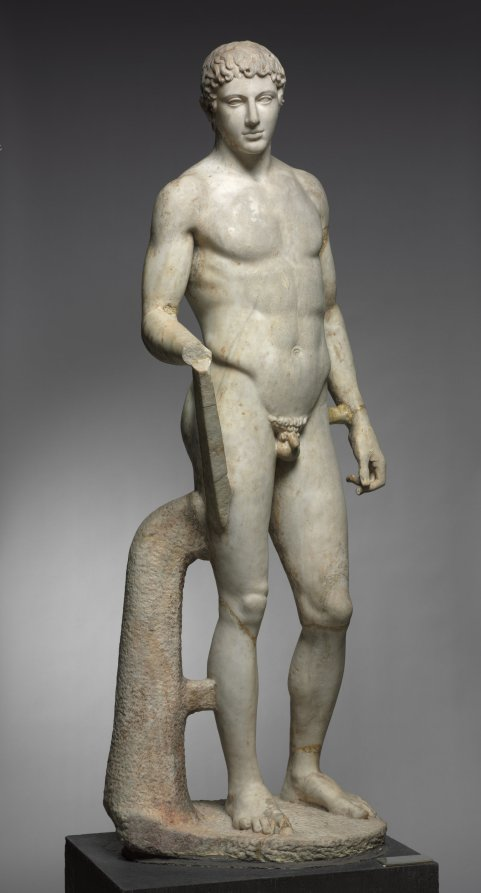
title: Statue of an Athlete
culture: Italy, Roman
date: 1–100 CE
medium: marble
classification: Sculpture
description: This idealized athlete recalls Greek sculptural types invented and popularized during the 400s BC. Large-scale athletes and other sculptures like this were originally created by famous artists as sanctuary dedications. Centuries later, they were widely copied and adapted by Roman sculptors, whose clients sought their own versions of earlier masterpieces. Working in marble rather than bronze, these sculptors added certain elements for stability, such as the struts and the large tree trunk beside the right leg here. Sculptures like this one are profoundly complex, made by and for Romans but descended from Greek ancestors.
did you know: For many years, this sculpture stood in the rotunda of the Cleveland Museum of Art.